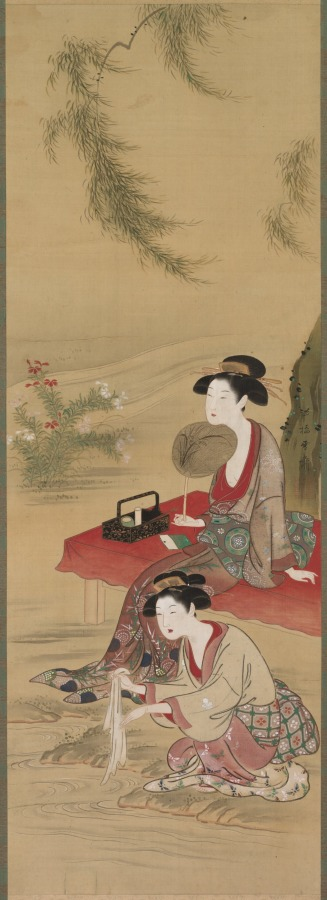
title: Beneath the Willow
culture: Japan, Edo period (1615–1868)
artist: Tsukioka Sessai (Japanese, d. 1839)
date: after 1778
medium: Hanging scroll; ink and color on paper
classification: Painting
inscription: Signed: Bridge of the Law Sessai (Hokyo Sessai). Sealed: Sessai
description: Two young women cool themselves by a river as a willow blows in the breeze. One crouches down to rinse a hand towel, while the other sits with her chin balanced on her fan. Beside her is a black lacquer tray with a floral design in gold, holding her tobacco kit. Tsukioka Tessai was an Osaka-based ukiyo-e artist who was especially respected for his representations of beautiful women (bijin). The court bestowed upon him the rank Bridge of the Law (hokyo) in 1778, and he was eventually elevated in rank to Eye of the Law (hogen).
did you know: The willow tree may refer to the contemporary Edo fashion for elongated "willowy" beauties.